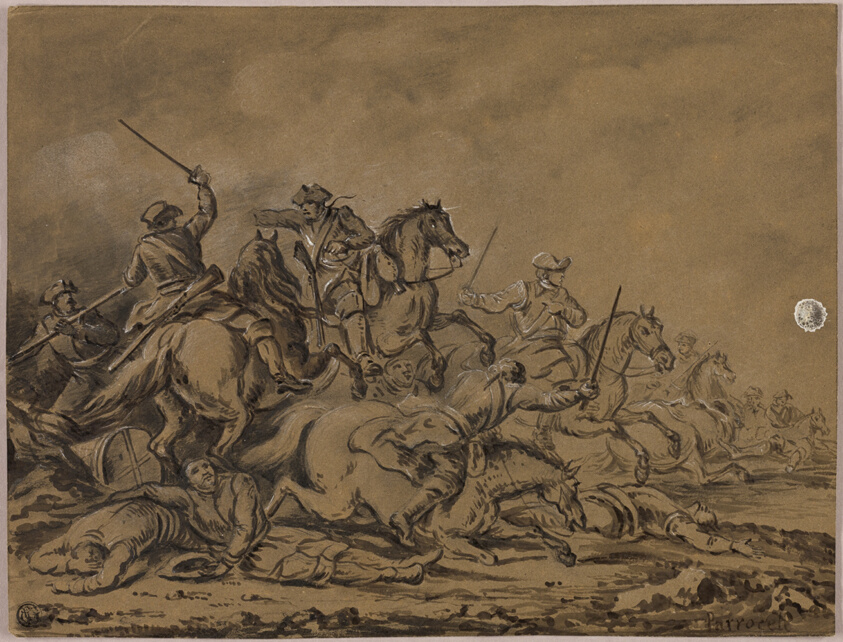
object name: Drawing and Watercolor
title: Cavalry Skirmish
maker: After Guillaume Courtois (French, 1628-1679); or Joseph François Parrocel (French, 1704-1781)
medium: Brush and brown wash, heightened with gum arabic and lead white (discolored), with black chalk over graphite, on brown wove paper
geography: France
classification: brush and wash; paper; drawings (visual works); prints and drawing